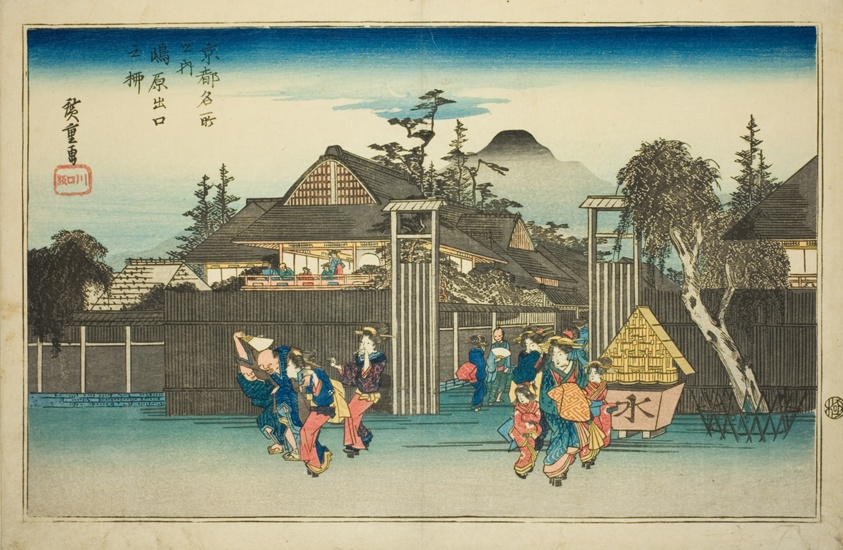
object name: Print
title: Willow Tree at the Gate of the Shimabara Pleasure Quarrter (Shimabara deguchi no yanagi), from the series "Famous Places in Kyoto (Kyoto meisho no uchi)"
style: Japanese (culture or style)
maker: Utagawa Hiroshige 歌川 広重; Japanese, 1797-1858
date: c. 1834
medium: Color woodblock print; oban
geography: Japan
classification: woodblock print; print; asian art